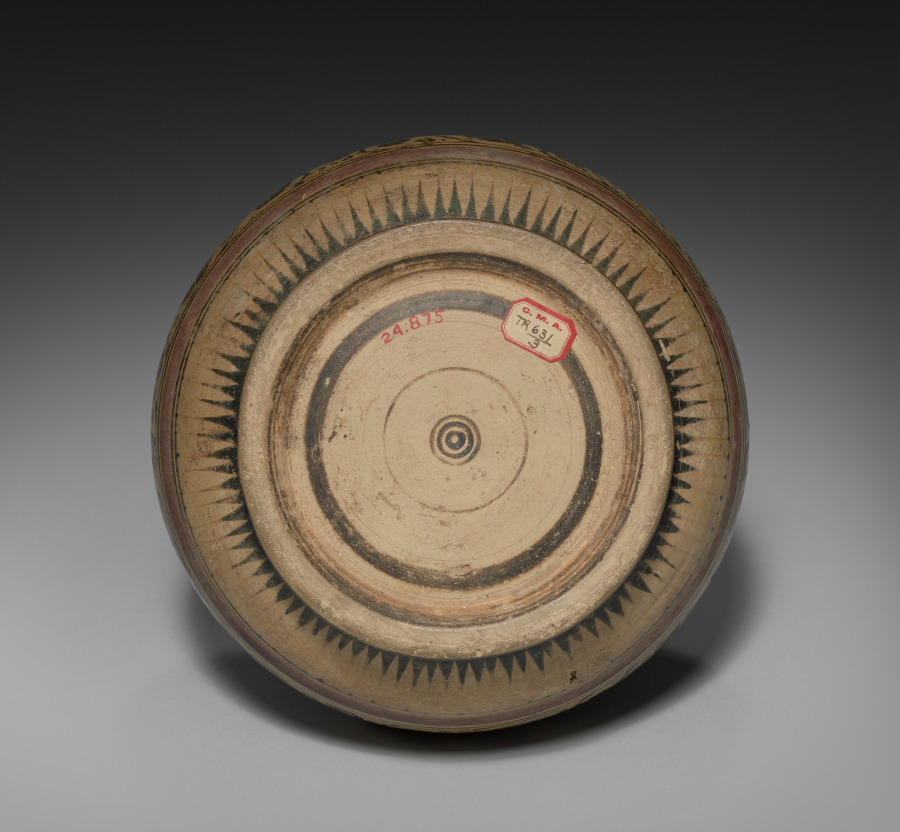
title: Corinthian Vase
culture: Greece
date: 600s BCE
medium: earthenware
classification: Ceramic